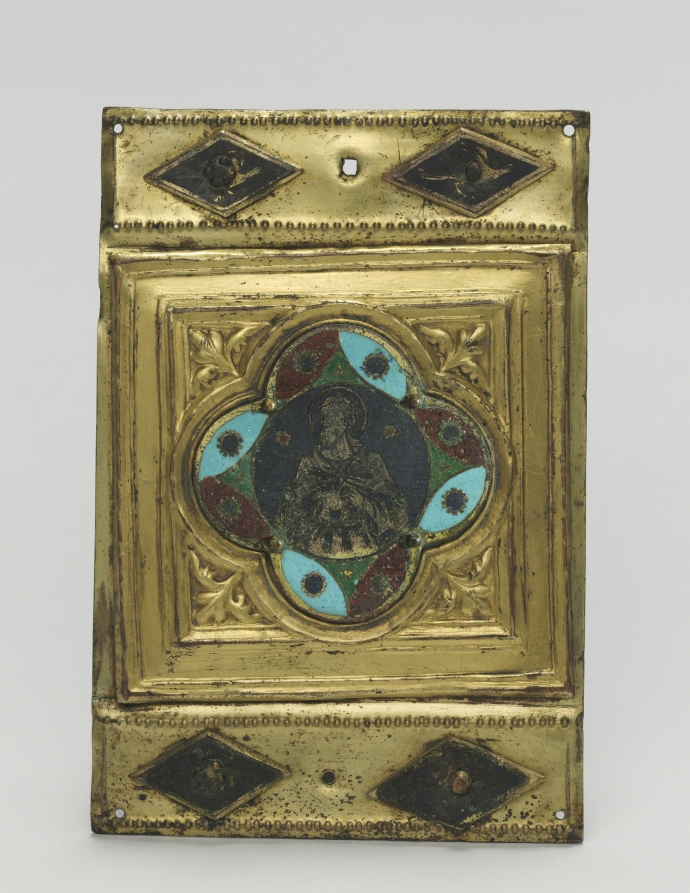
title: Ornamental Plaque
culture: Italy, Tuscany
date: c. 1380–1400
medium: champlevé enamel, glass paste stones, and gilding on copper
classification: Enamel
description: These plaques appear to have been part of a larger ensemble forming a band of decoration affixed to a church altar. Each plaque is decorated in multiple techniques-embossing, engraving, enameling, and gilding-to create a sumptuous visual effect.